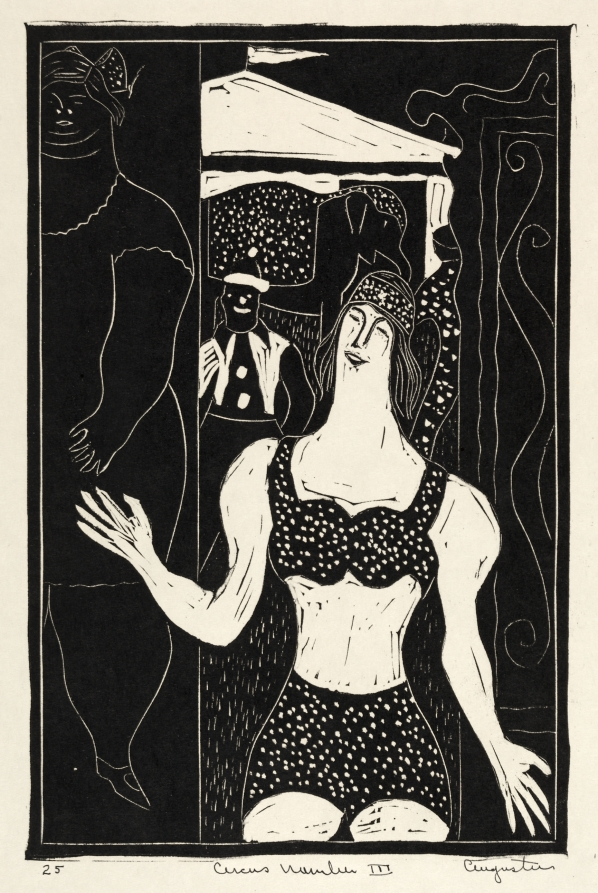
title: Circus, No. 3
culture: America, Ohio, Cleveland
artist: Augustus Peck (American, 1906–1975)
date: 1920–30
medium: linoleum cut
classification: Print